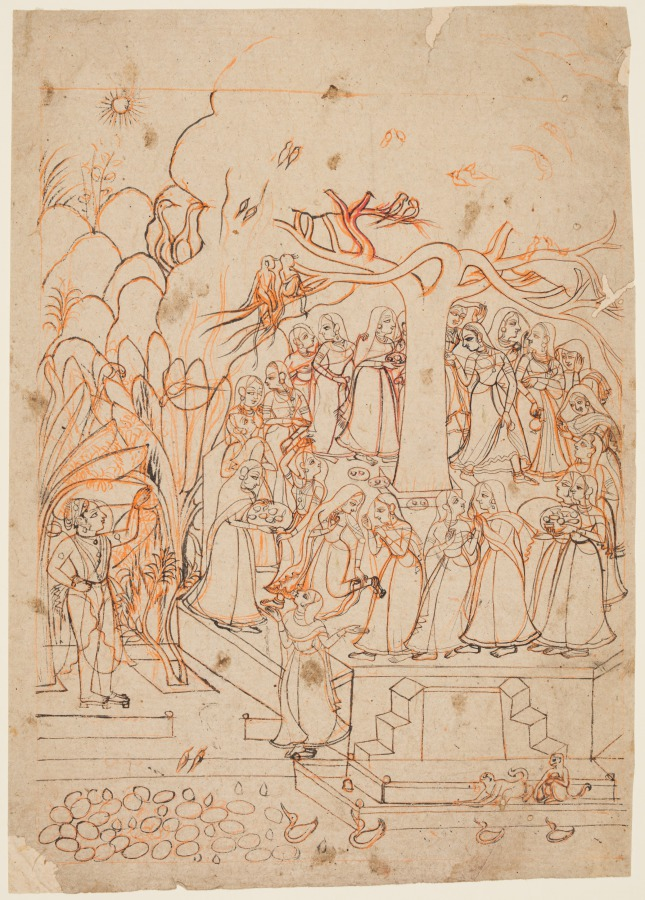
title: Krishna watches the milkmaids circumambulating a sacred tree: The month of Jyestha (May–June), from a Barahmasa (The Twelve Months)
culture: Northwestern India, Rajasthan, Rajput Kingdom of Bundi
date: c. 1760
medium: gum tempera on paper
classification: Painting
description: On the day of Jyestha Purnima, having fasted for three days, married women worship the banyan tree by circumambulating it. The goal of this ritual is to ask for a long life for their husbands. The milkmaids (gopis), having already accepted Krishna as their supreme master, are praying for his well-being, while he observed the ritual from behind the plantains.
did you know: The birds and monkeys sitting around the tree are depicted in pairs, like loving couples.